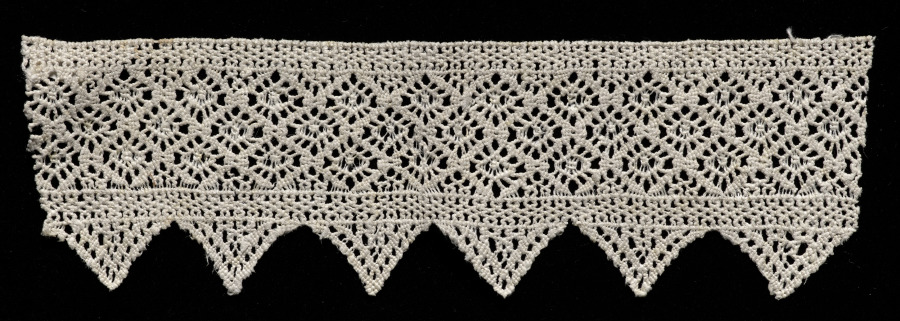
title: Lace Insertion and Edging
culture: Italy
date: 1500s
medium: Knotted lace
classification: Lace